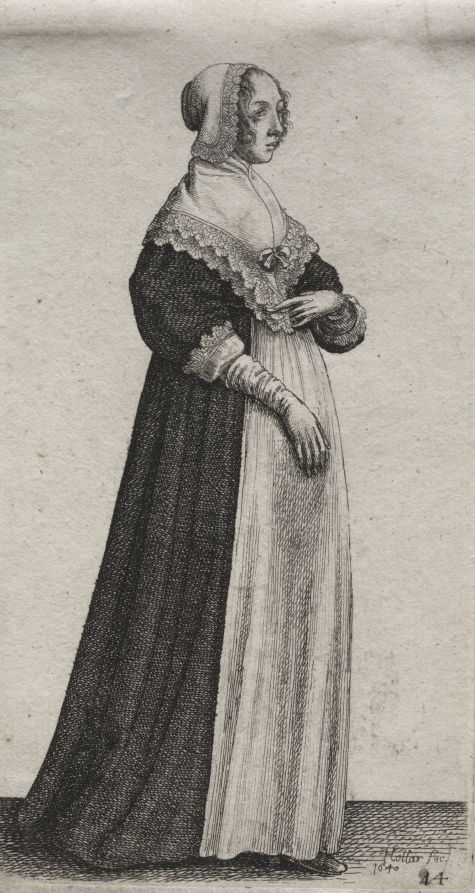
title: The Several Habits of English Women, from the Nobility to the Country Women as they are in these times: The Woman with a High Neckcloth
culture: Bohemia, 17th century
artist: Wenceslaus Hollar (Bohemian, 1607–1677)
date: 1640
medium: etching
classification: Print